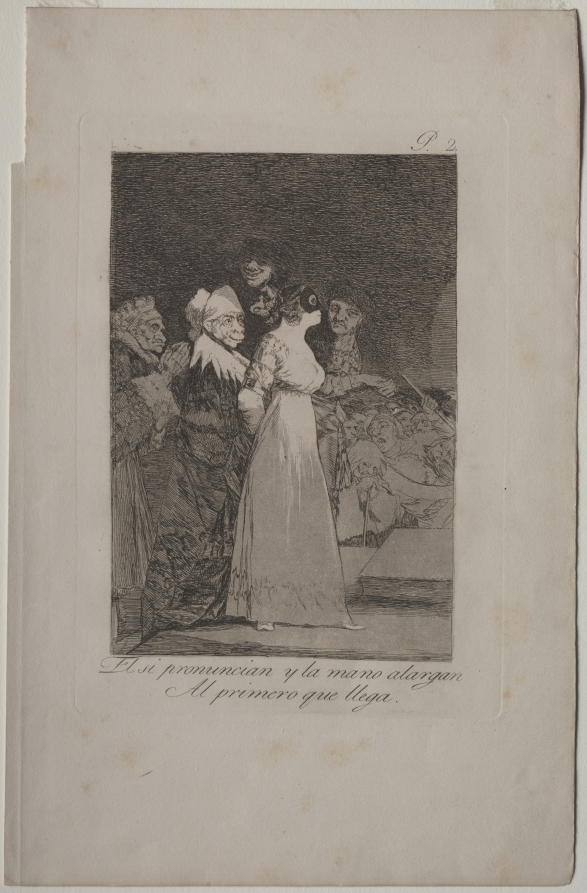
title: They Say "Yes" and Give Their Hand to the First Comer, Plate 2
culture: Spain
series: Los Caprichos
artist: Francisco de Goya (Spanish, 1746–1828)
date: 1799 (printed c. 1855)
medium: etching and aquatint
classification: Print